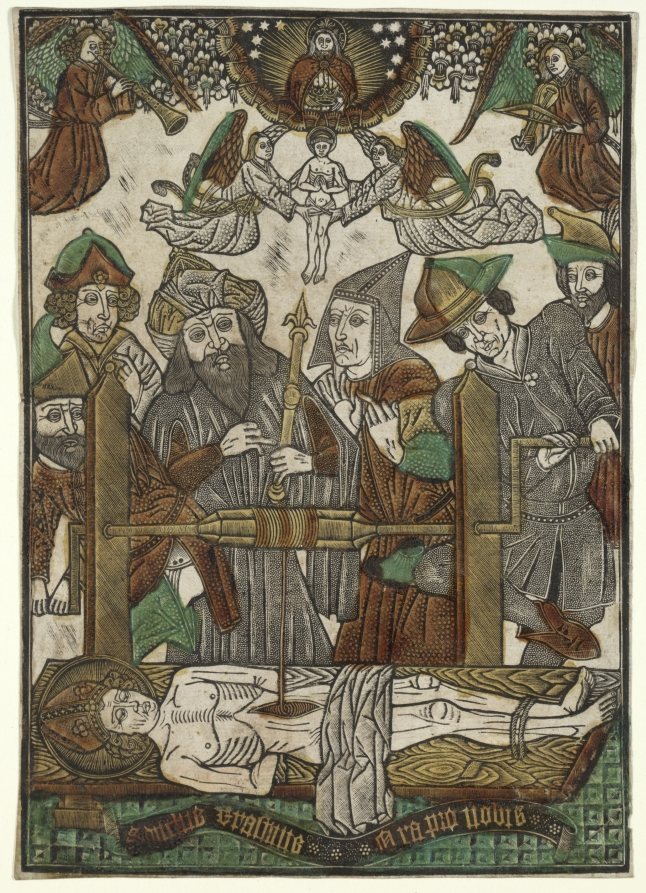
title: The Martyrdom of St. Erasmus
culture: Germany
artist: Master of the Bergwolken (German)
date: c. 1480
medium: dotted print with hand coloring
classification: Print